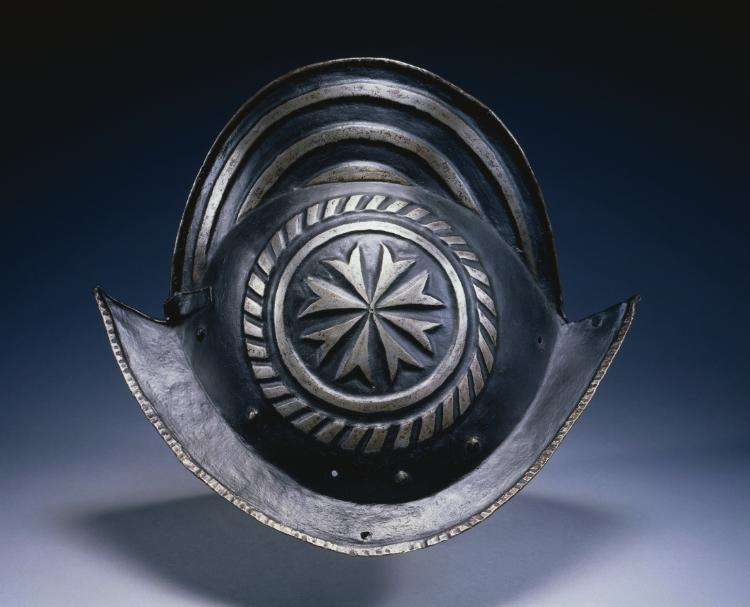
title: Black and White Morion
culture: Germany, early 17th Century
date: c. 1600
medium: steel with black paint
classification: Arms and Armor